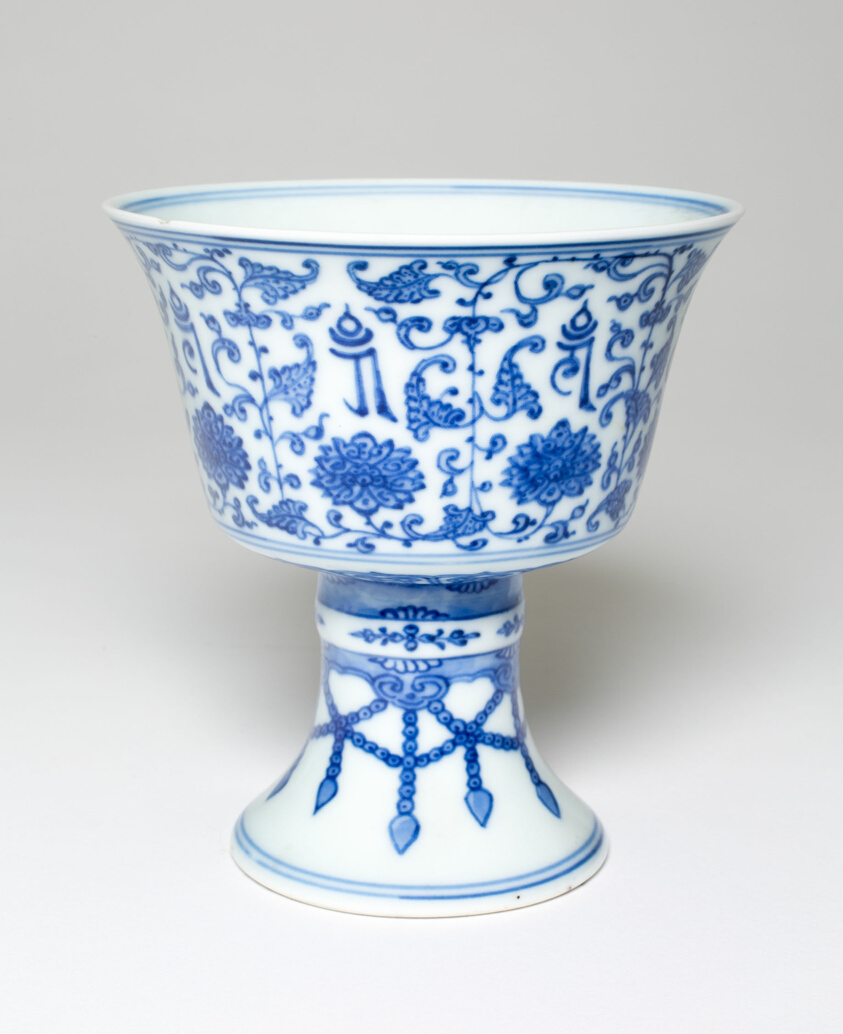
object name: Vessel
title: Stem Cup with Peony Flowers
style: Chinese (culture or style)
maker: China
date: Qing dynasty (1644–1911), Qianlong reign mark and period (1736–1795)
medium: Porcelain painted in underglaze blue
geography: China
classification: drinking vessel; porcelain; asian art; ceramics; vessel